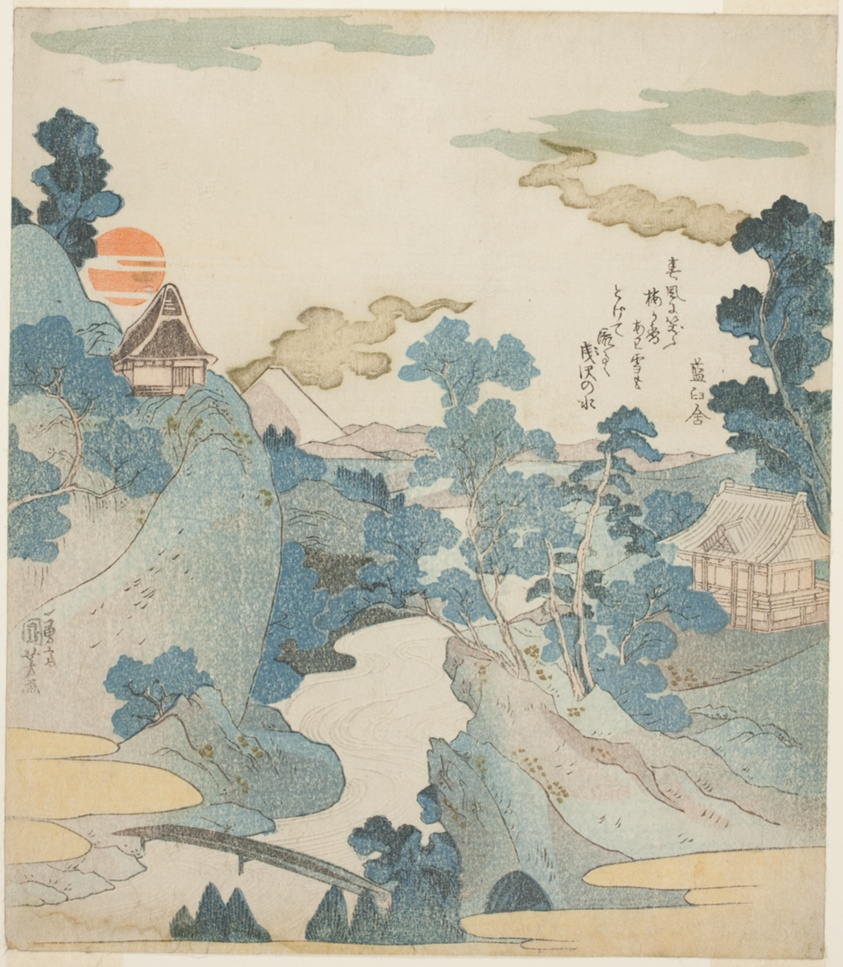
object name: Print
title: Distant View of Mount Fuji at Dawn from Hakone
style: Japanese (culture or style)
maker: Utagawa Kuniyoshi (Japanese, 1787-1861)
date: c. 1828/30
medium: Color woodblock print; shikishiban, surimono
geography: Japan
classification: woodblock print; print; asian art